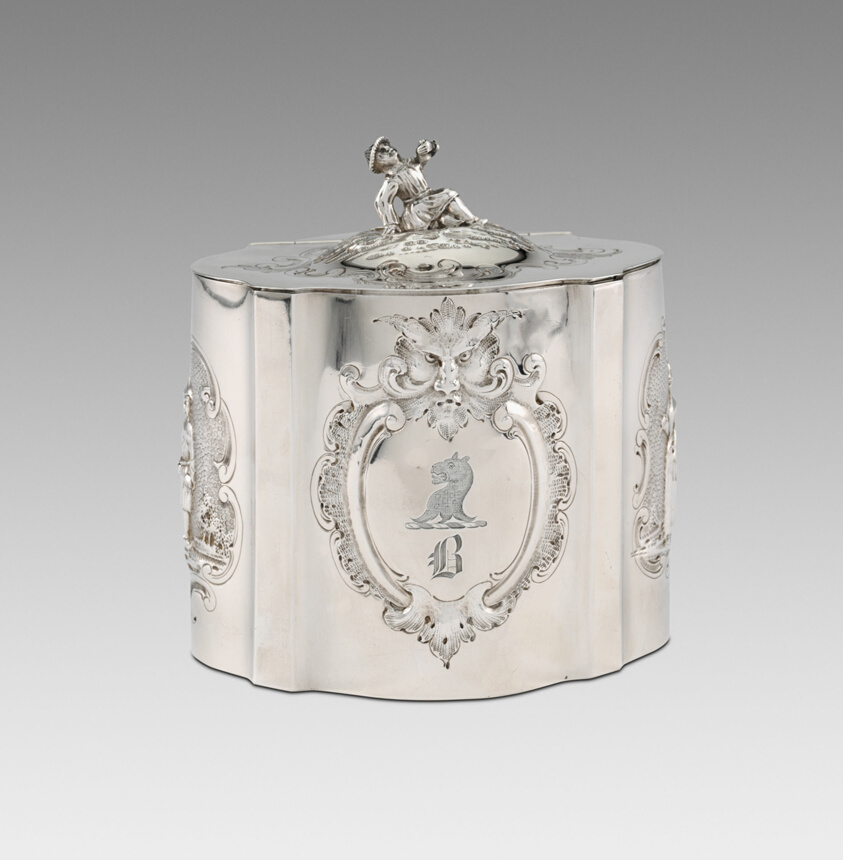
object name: Metalwork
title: Tea Caddy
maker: Vincent Laforme (American, born Germany, 1823-1893); and Francis J. Laforme (American, born Germany, 1827–1895); Retailed by Lincoln & Foss (American, c. 1820–1857); Boston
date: 1850–57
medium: Silver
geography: Boston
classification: teaware; container; silver; american decorative arts; american arts; decorative arts